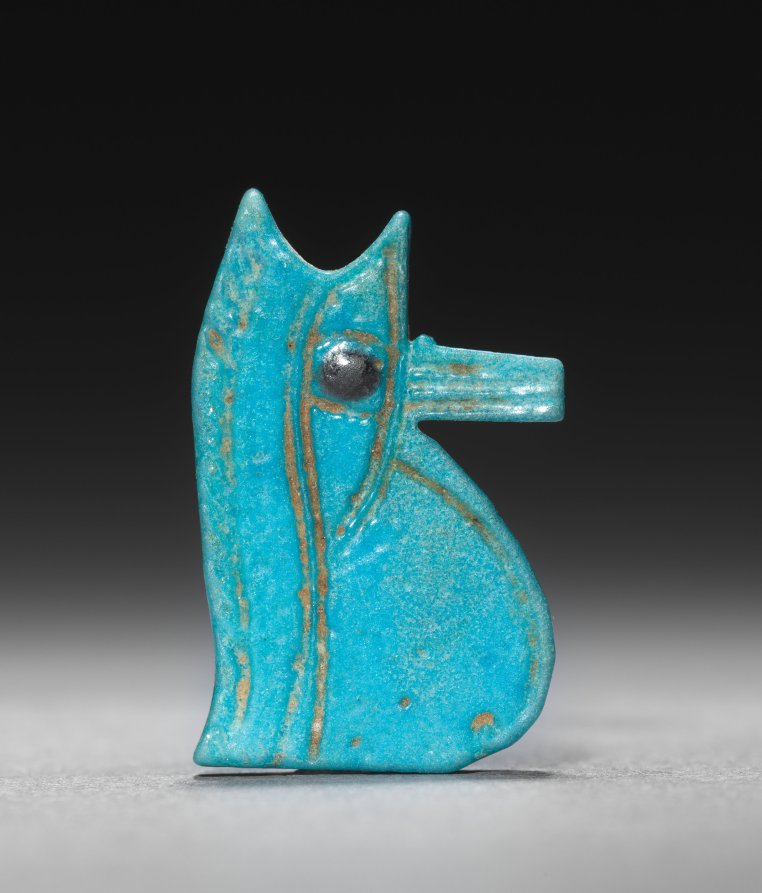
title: Eye of Horus Amulet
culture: Egypt, Third Intermediate (1069–715 BCE), Dynasties 22–25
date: 945–715 BCE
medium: turquoise faience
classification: Amulets